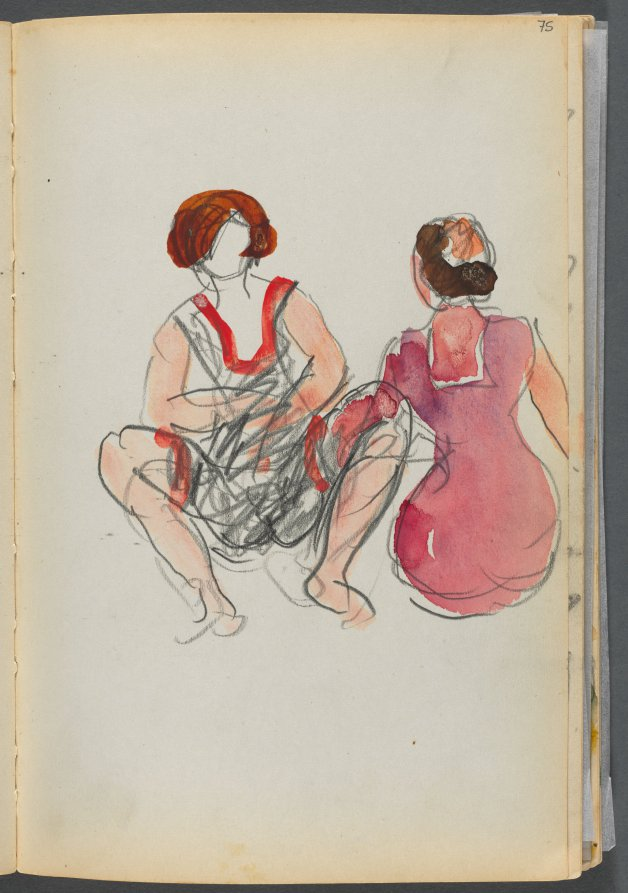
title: Sketchbook- The Granite Shore Hotel, Rockport, page 075: Seated Bathers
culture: America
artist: Maurice Prendergast (American, born Newfoundland [now Canada], 1858–1924)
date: 1905–10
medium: graphite and watercolor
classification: Bound Volume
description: This sketchbook contains 72 pages of pencil drawings and 9 watercolors of Cape Ann. On the inside of the cover Prendergast wrote the address of the Granite Shore Hotel in Rockport, Massachusetts.